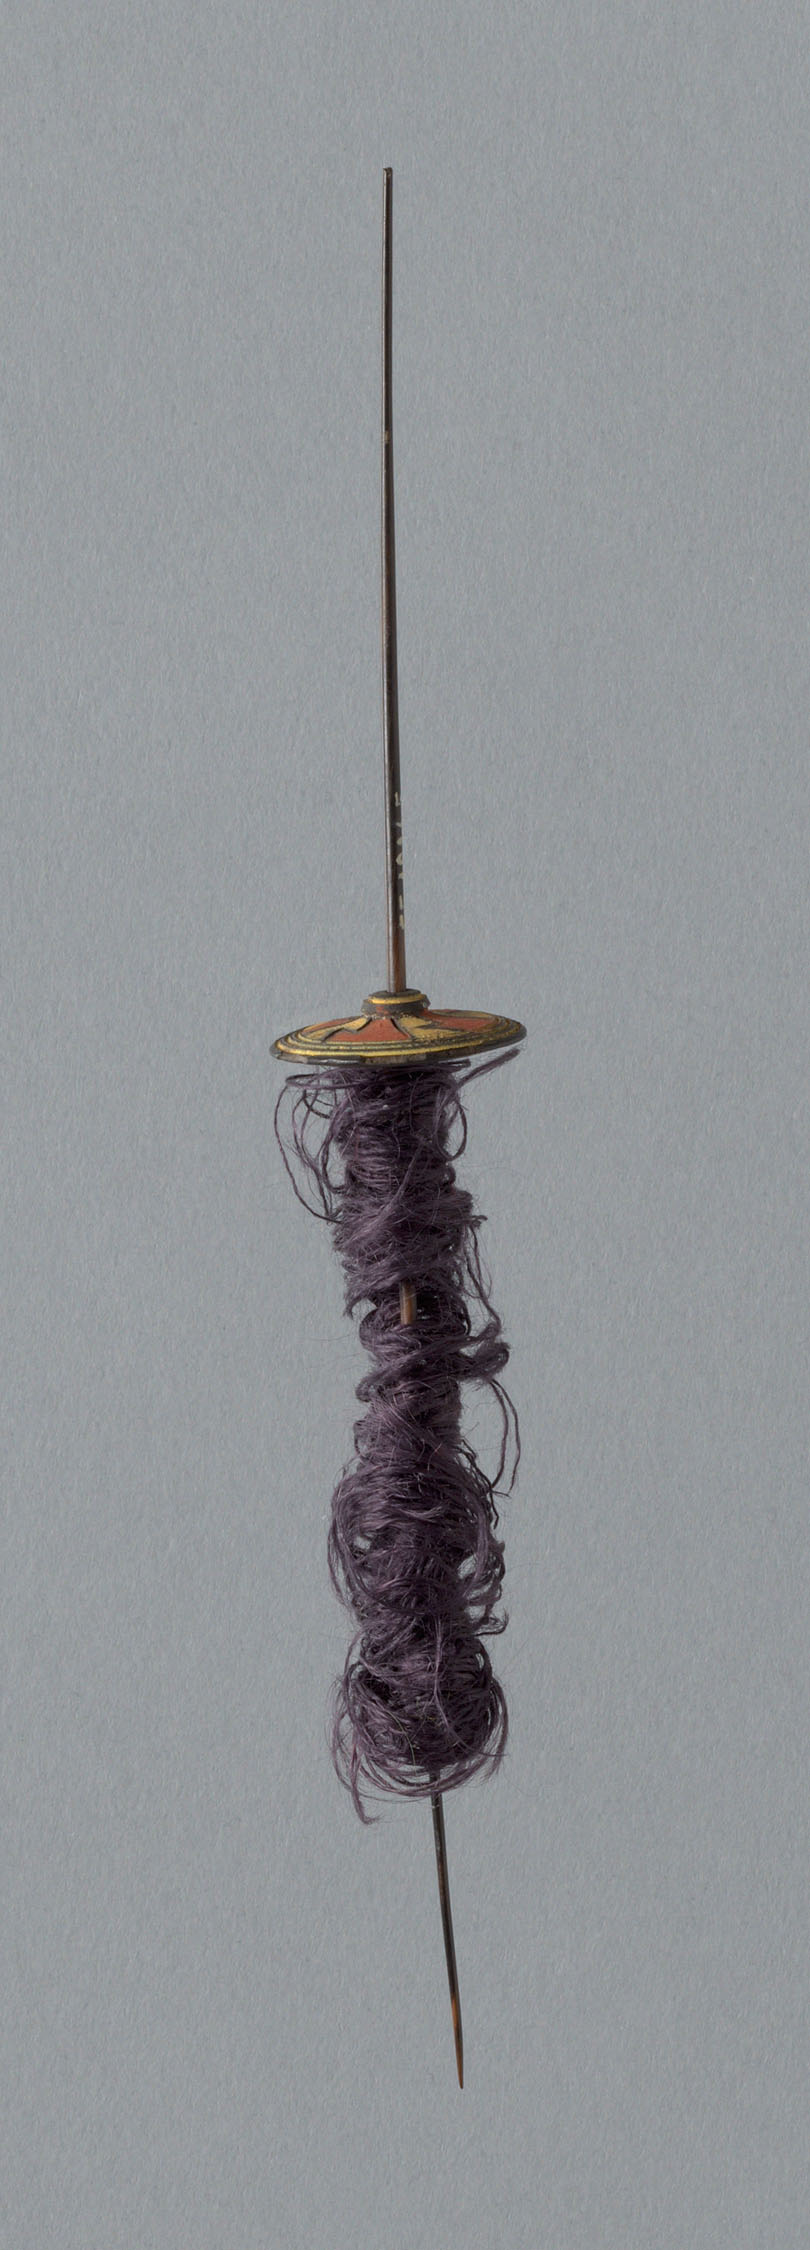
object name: non-art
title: Wooden Spindle with Ceramic Whorls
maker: Possibly central coast, Peru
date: 1000/1476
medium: Wood, polychrome ceramic, and wool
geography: Peru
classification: textile working equipment; whorls (spindle flywheels); spindles (textile working equipment); textile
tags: super/natural